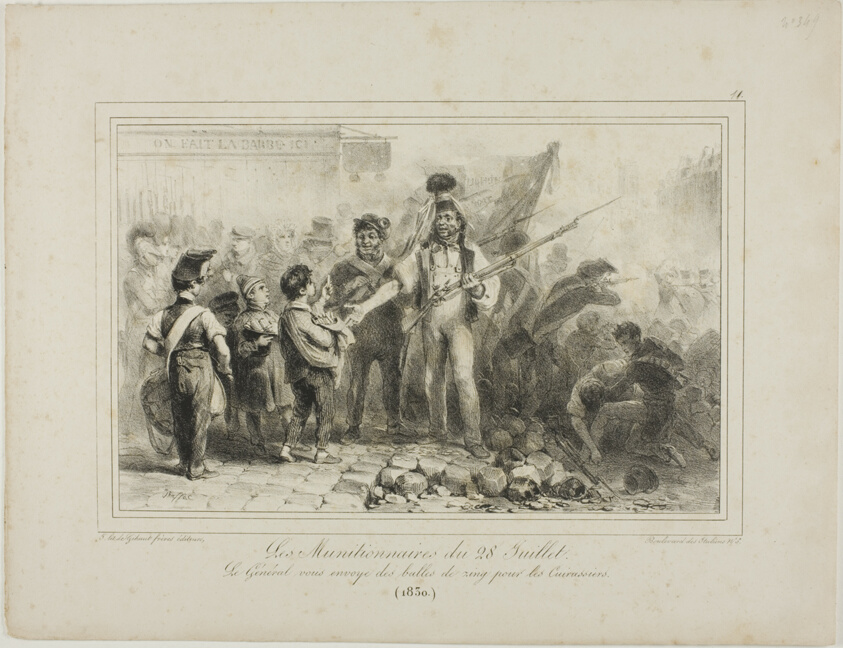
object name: Print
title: The Munitioners of July 28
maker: Denis Auguste Marie Raffet (French, 1804-1860); printed by Chez Gihaut Frères (French, 19th century)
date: 1831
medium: Lithograph in black on ivory wove paper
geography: France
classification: lithograph; print; prints and drawing